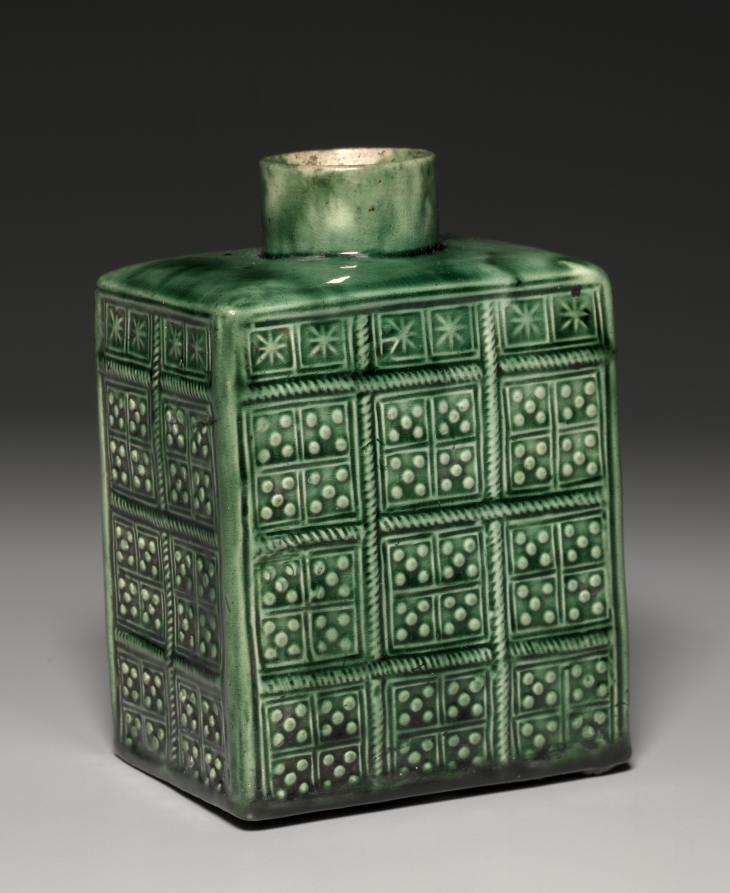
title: Tea Caddy with Lid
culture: England, 18th century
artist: Staffordshire Factory (British)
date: c. 1750–1800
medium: earthenware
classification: Ceramic